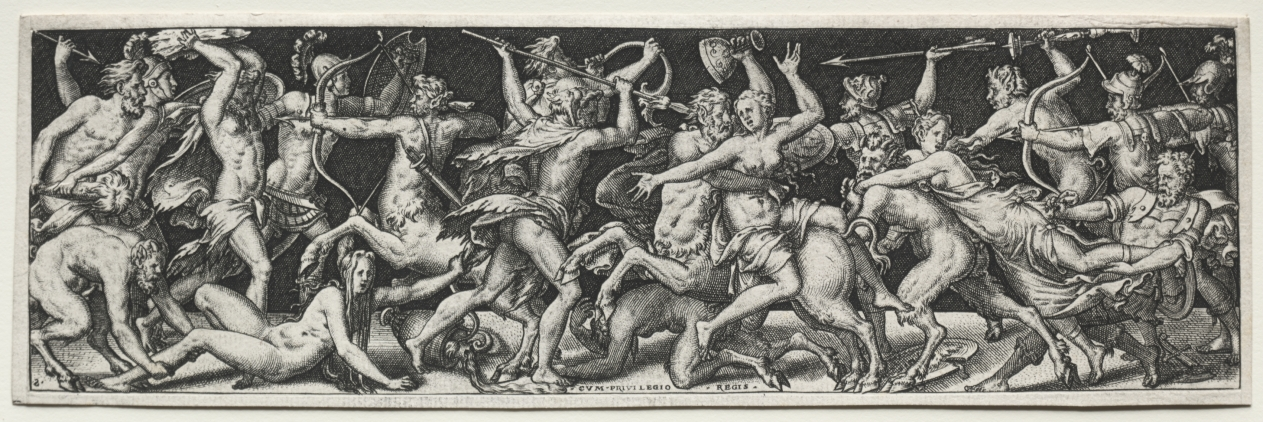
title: Combats and Triumphs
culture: France, 16th century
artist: Etienne Delaune (French, 1518/19-c. 1583)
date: c. 1550–72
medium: engraving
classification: Print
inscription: lower right, in plate: ·S·[backwards] ; lower center, in plate: ·CVM·PRIVILEGIO · REGIS ·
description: Etienne Delaune (French, 1518/19-1583) Combats and Triumphs, probably 1560s Engravings Gift of Leonard C. Hanna 1924.671-.674 The Triumph of Bacchus Battle of Men and Animals Combat of the Naked Men Battle of the Centaurs and the Lapiths The four prints shown here come from a series of twelve known as the Combats and Triumphs. The friezelike composition reflects the artist's study of marble relief carvings on Greek and Roman sarcophagi (coffins), here reduced to a preciously small setting. Against a flat, stagelike background, Delaune's balletic warriors engage in a Mannerist version of artificial war. Etienne Delaune was inspired by the art created at Fontainebleau, but he worked in Paris and then Strasbourg during the late 1500s. His small, exquisitely executed engravings reflect his training as a goldsmith and his work as a medallist.